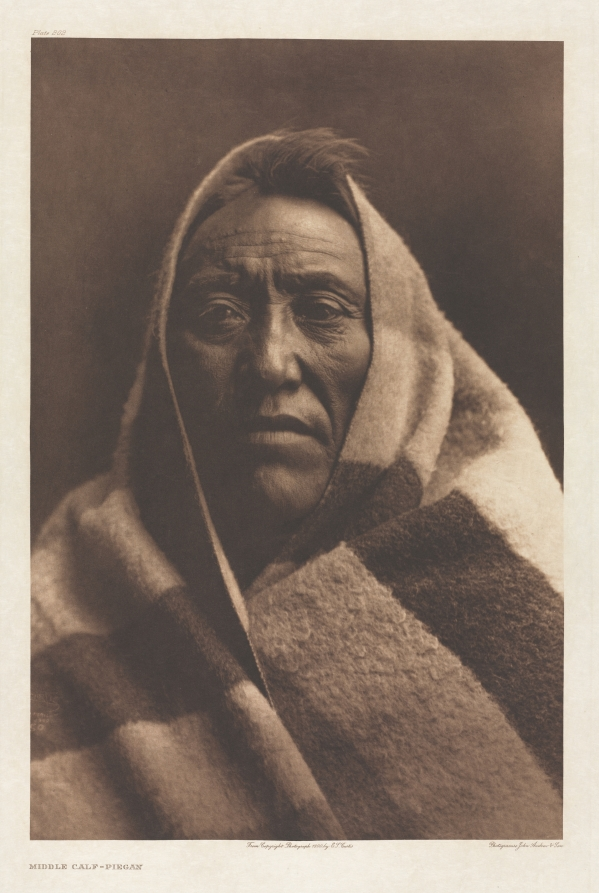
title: Portfolio VI, Plate 202: Middle Calf - Piegan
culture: America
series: The North American Indian: being a series of Portfolios picturing and describing the Indians of the United States, the Dominion of Canada, and Alaska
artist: Edward S. Curtis (American, 1868–1952)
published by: The University Press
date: 1900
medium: photogravure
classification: Portfolio